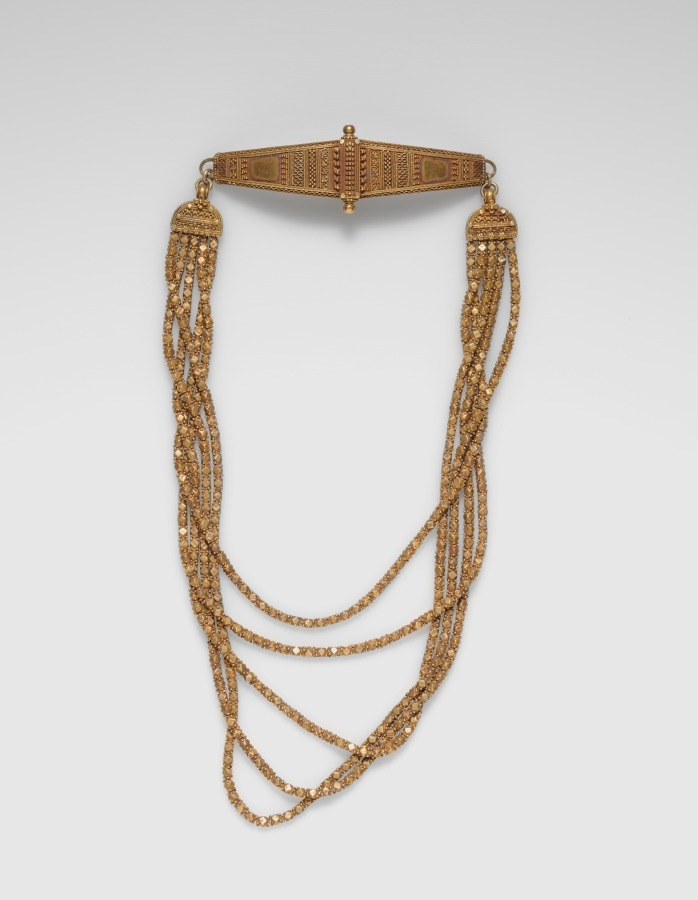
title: Necklace: SIRO BO MALEYA -- (pepper-flower-garland)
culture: Ceylon, Kandy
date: 1700s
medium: gold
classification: Jewelry